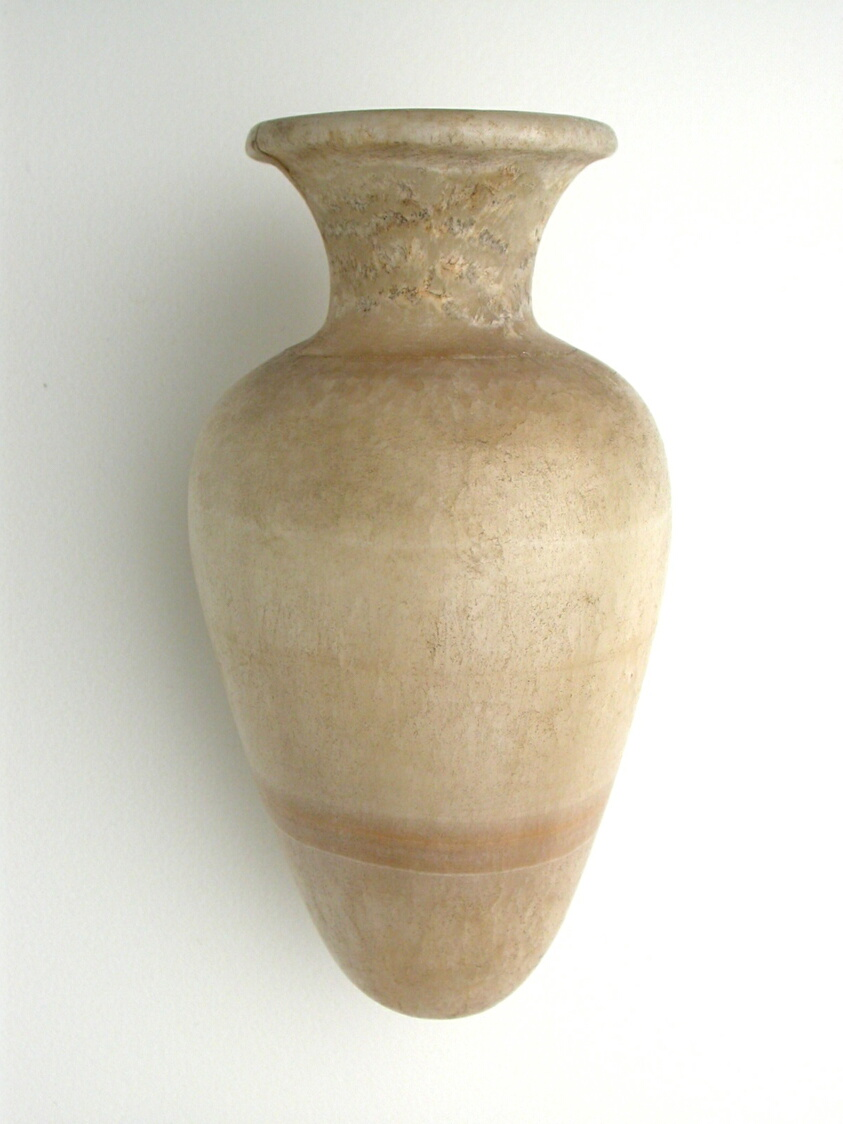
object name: Vessel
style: egyptian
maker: Egyptian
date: New Kingdom, Dynasty 18–20 (about 1550–1069 BCE) ?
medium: Travertine (Egyptian alabaster)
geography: Egypt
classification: vessel; stone; ancient art